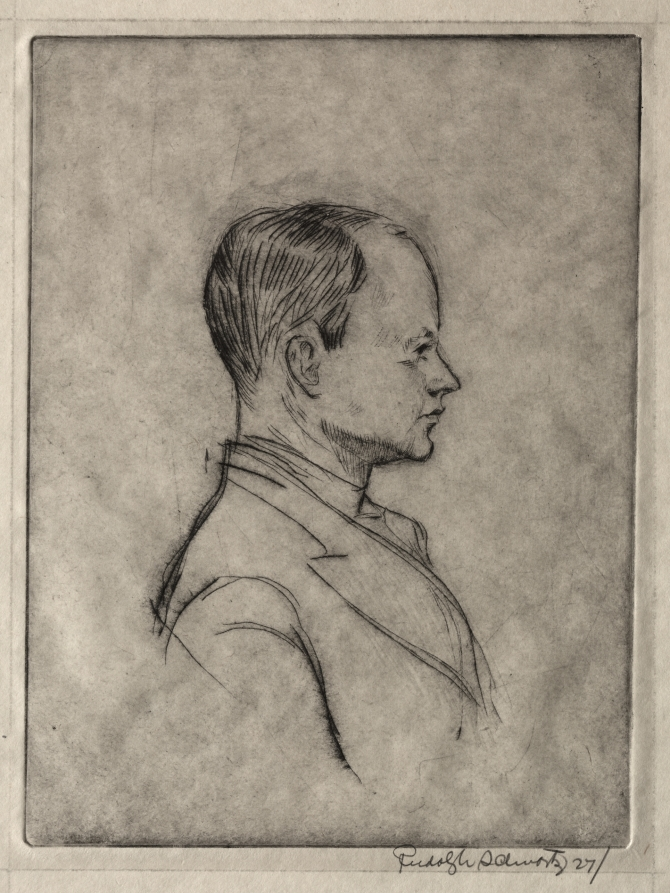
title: Portrait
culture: America, late 19th-early 20th century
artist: Rudolf Schwartz (American, 1866–1912)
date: c. late 1800s–early 1900s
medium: drypoint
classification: Print